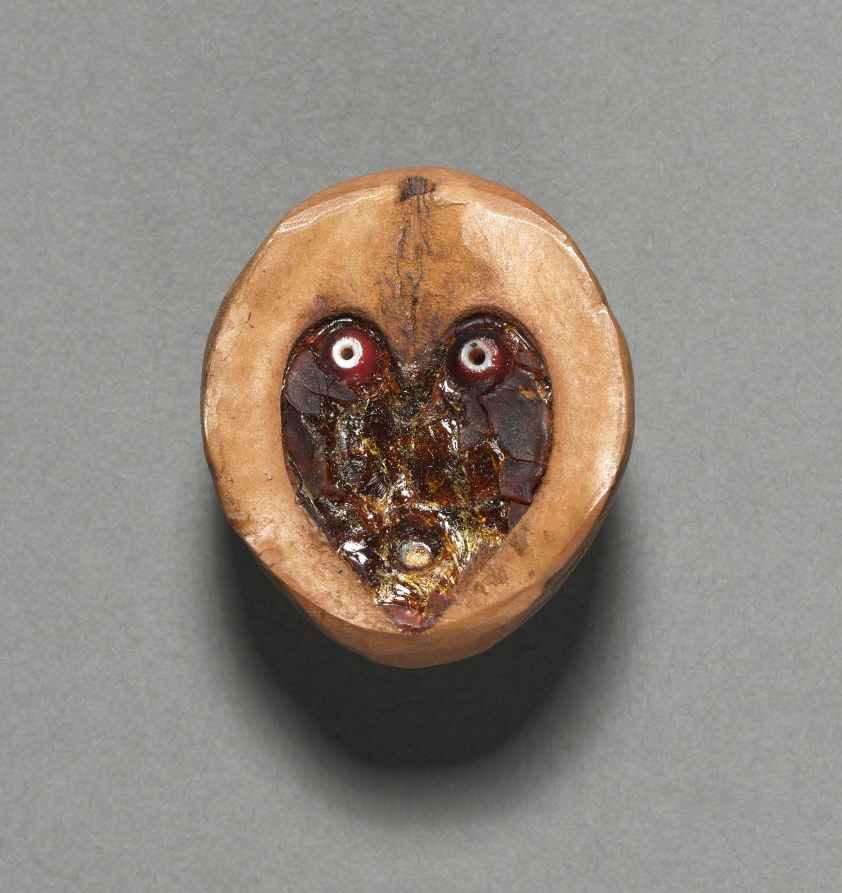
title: Gambling Dice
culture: California, Tulare, Unassigned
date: before 1917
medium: hollow shell, resin, glass beads, mica/seashell fragment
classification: Implements